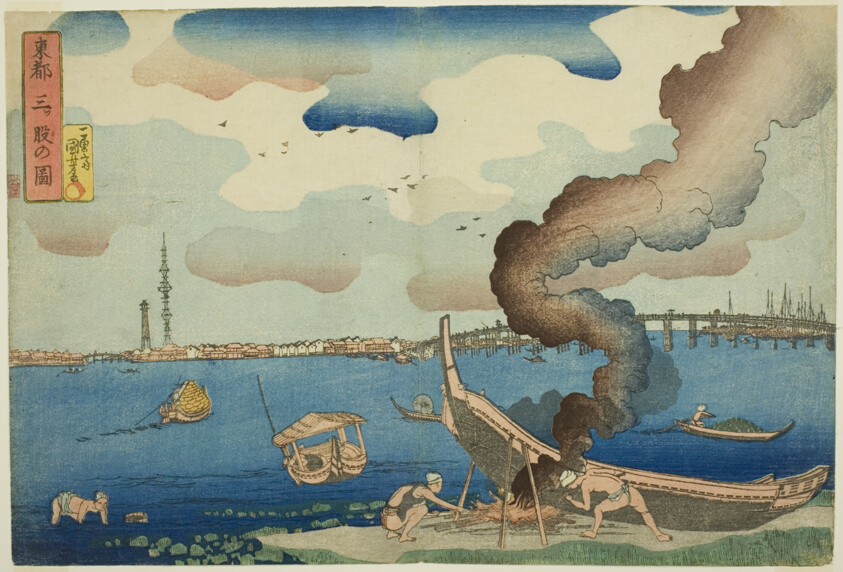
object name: Print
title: View of Mitsumata in the Eastern Capital (Toto Mitsumata no zu), from the series "Views of the Eastern Capital (Toto no zu)"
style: Japanese (culture or style)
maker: Utagawa Kuniyoshi (Japanese, 1797-1861)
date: early 1830s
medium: Color woodblock print; oban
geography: Japan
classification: woodblock print; print; asian art